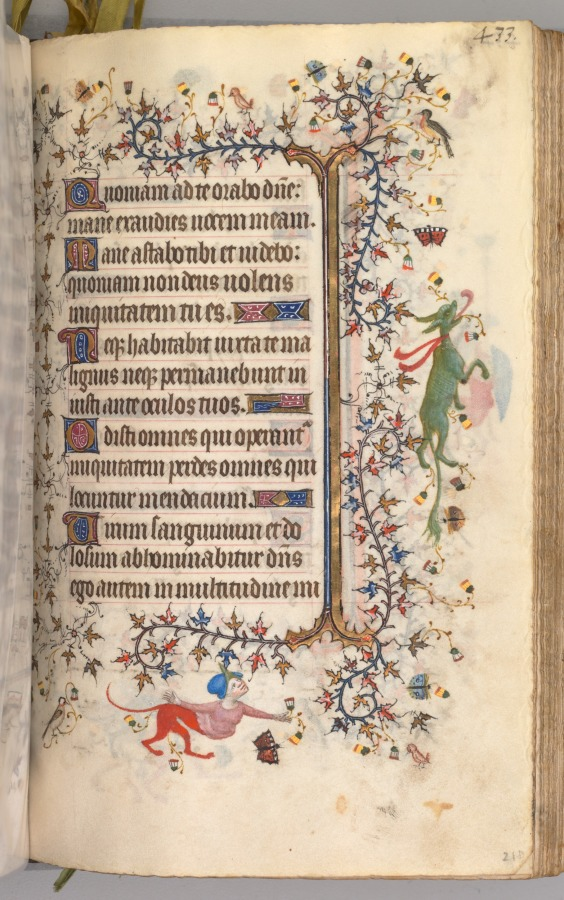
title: Hours of Charles the Noble, King of Navarre (1361-1425): fol. 211r, Text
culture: France, Paris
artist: Master of the Brussels Initials and Associates (French)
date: c. 1405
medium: ink, tempera, and gold on vellum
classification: Bound Volume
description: This precious volume was obviously highly prized by its owner, the French-born King of Navarre, who had his coat of arms painted on no less than twenty folios. Rather than directly commissioning this manuscript from a specific workshop, it seems that Charles the Noble acquired his book of hours -- perhaps ready-made for the luxury market -- while on a trip to Paris in 1404-05. A collaborative effort, six painting styles are evidenced within the pages of this codex, those of two Italians, two Frenchmen, and two Netherlanders. The painter who was responsible for the planning and decoration of the book, and who produced seventeen of the large miniatures, was a Bolognese artist known as the Master of the Brussels Initials. His principal assistant, responsible for most of the borders, was a Florentine who signed his name "Zecho" da Firenze on folio 208 verso.